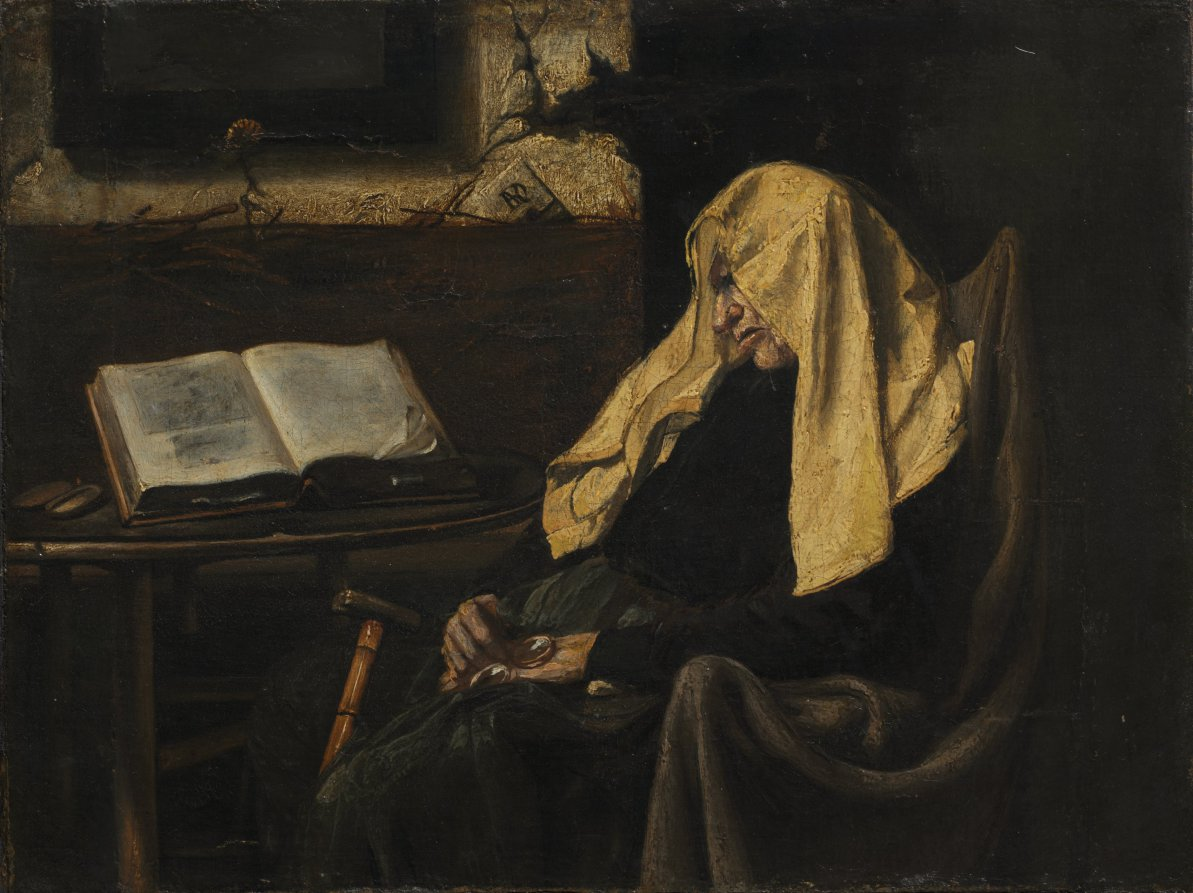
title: Old Woman Asleep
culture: possibly France, mid-19th Century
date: Mid 19th century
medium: oil on fabric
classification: Painting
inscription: Monogram on envelope at right edge of window sill: ard/f or rd/f